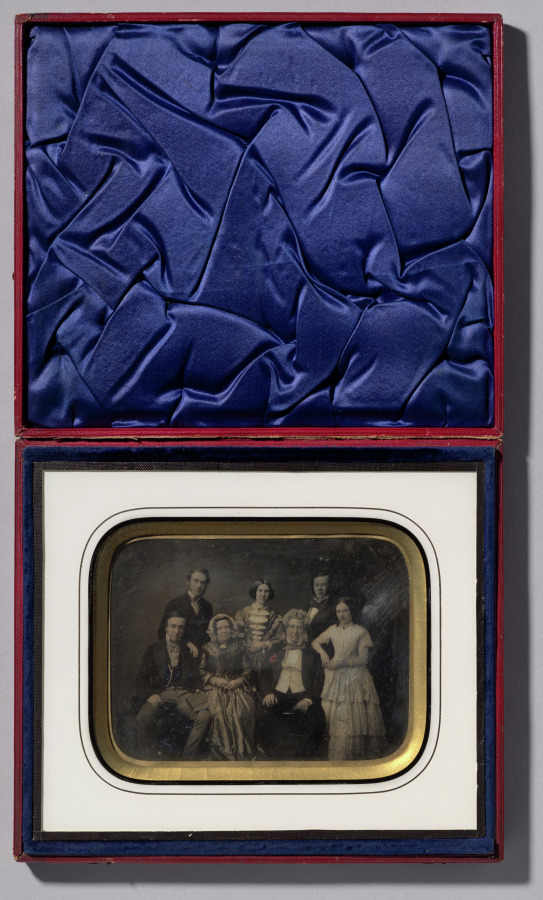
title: English family of seven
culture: England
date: c. 1840s-1850s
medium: daguerreotype, half-plate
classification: Photograph